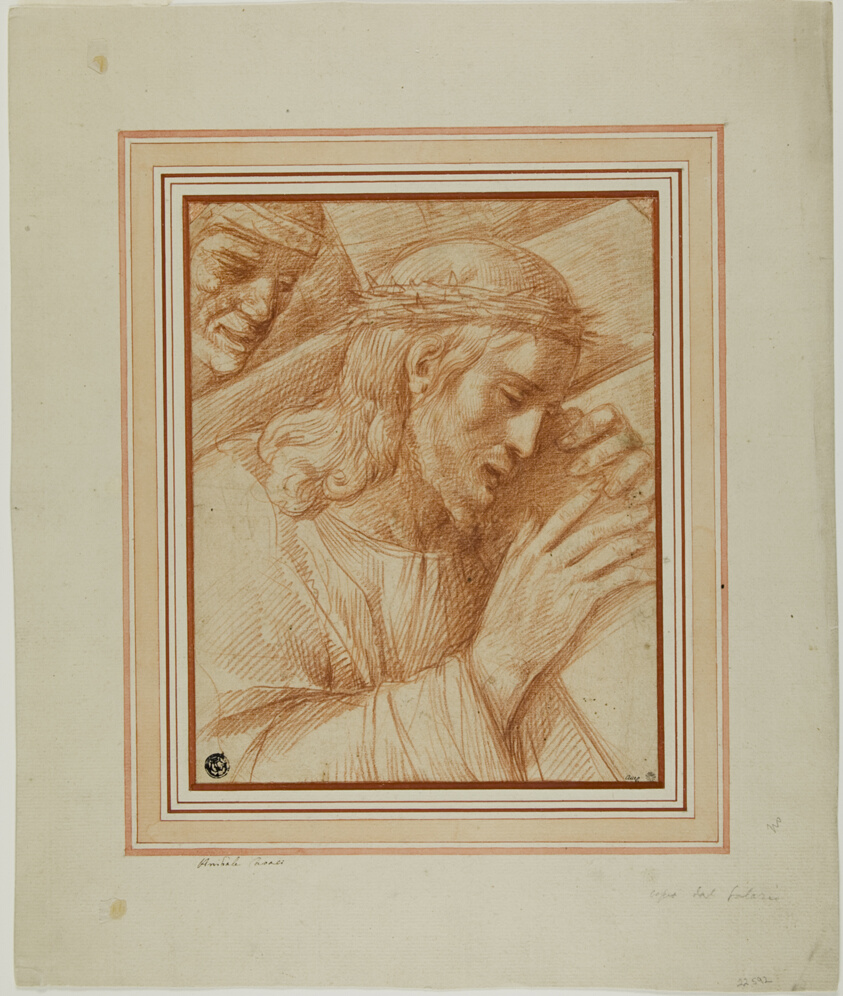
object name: Drawing and Watercolor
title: Christ Carrying the Cross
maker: Cesare Rossetti (Italian, 1568-c. 1621)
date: 1580/1600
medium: Red chalk on cream laid paper, laid down on ivory laid paper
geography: Italy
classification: chalk; drawings (visual works); prints and drawing